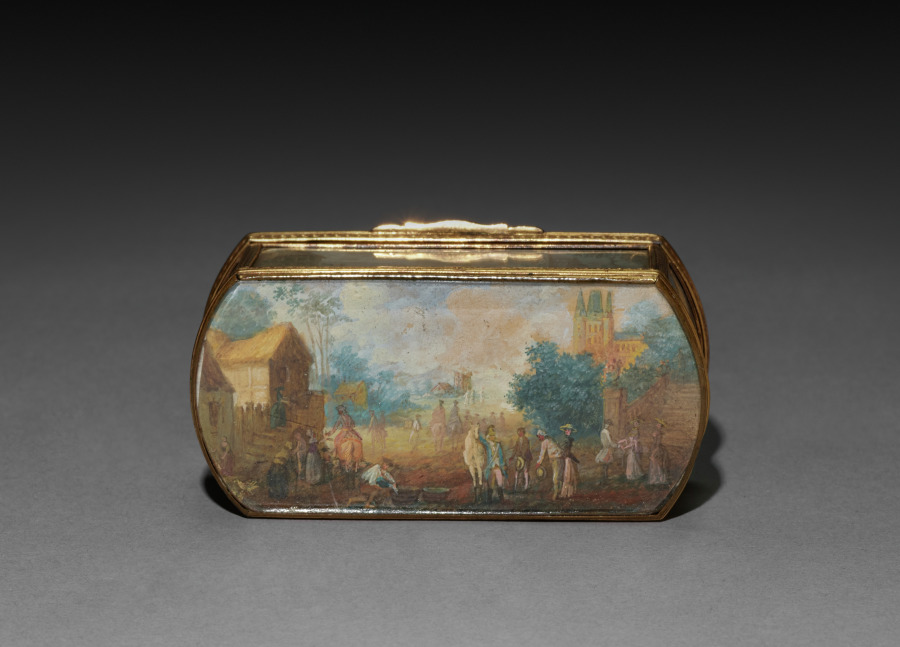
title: Snuff Box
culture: France, 19th century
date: 1800s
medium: gilt metal box with painted miniatures under glass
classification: Miscellaneous